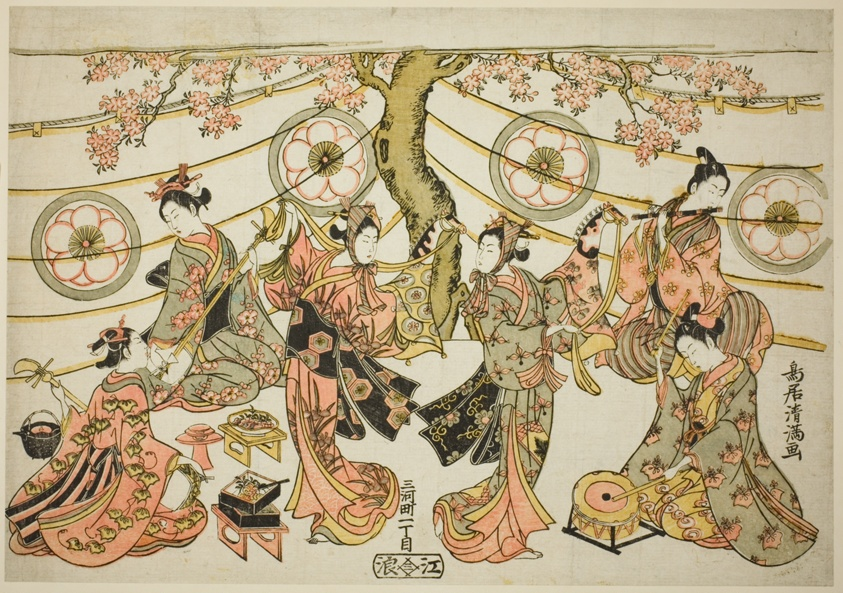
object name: Print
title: The Harugoma Dance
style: Japanese (culture or style)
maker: Torii Kiyomitsu I (Japanese, 1735-1785)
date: c. 1764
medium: Color woodblock print; o-oban yoko-e, benizuri-e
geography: Japan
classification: woodblock print; print; asian art